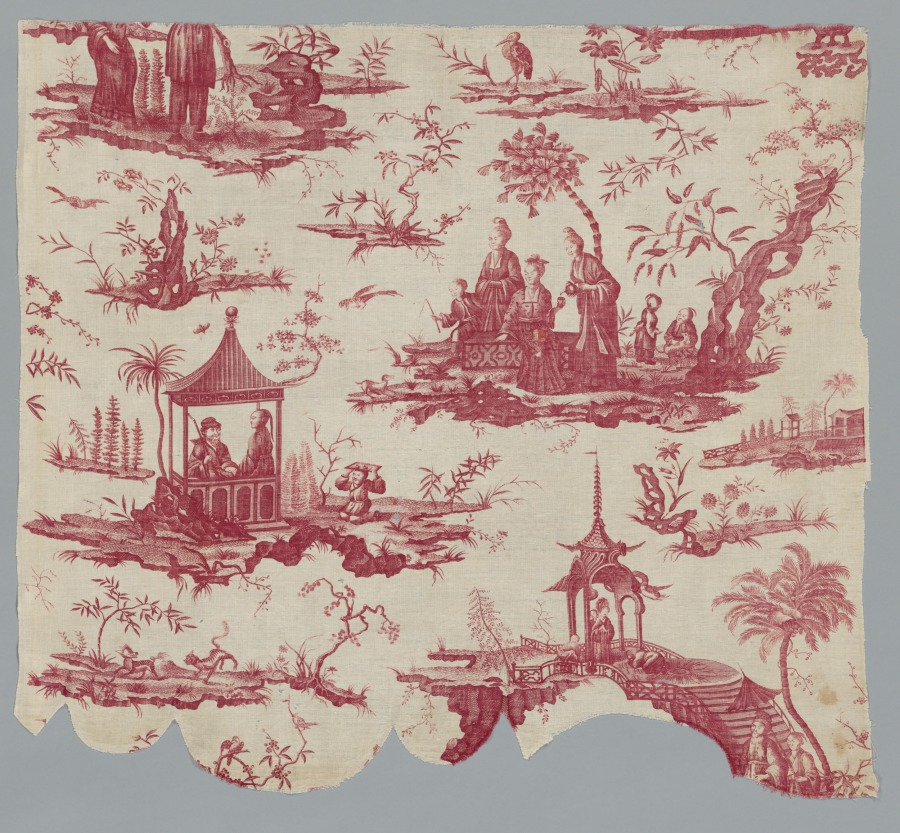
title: Fragment of Copperplate Printed Cotton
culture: France, 18th century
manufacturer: firm of Christophe Philippe Oberkampf (French, 1738–1815)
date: c. 1785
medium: copperplate printed cotton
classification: Textile